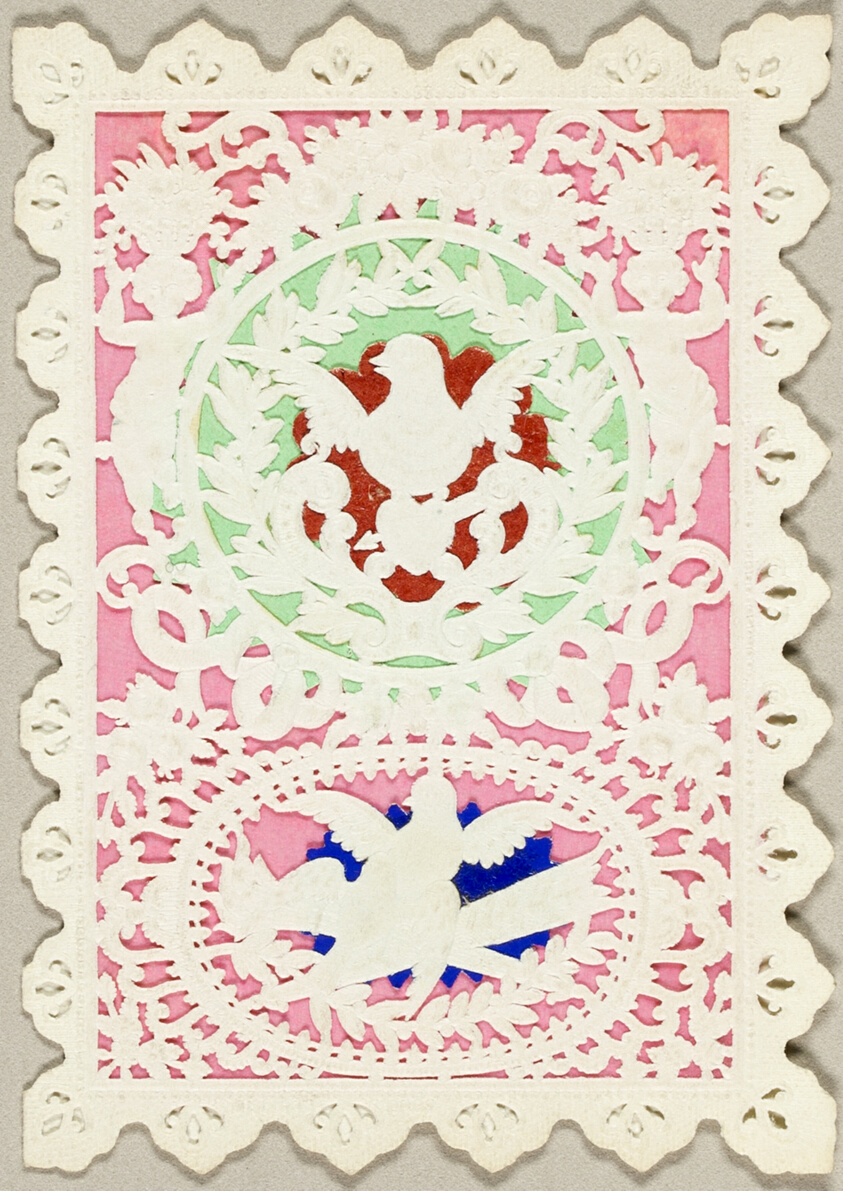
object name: Drawing and Watercolor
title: Untitled Valentine (Two Birds)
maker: Mullord Brothers (English, 19th century)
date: 1860/69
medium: Collaged elements under cut and embossed (designed) ivory wove paper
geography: England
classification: collage; valentine; prints and drawing; paper